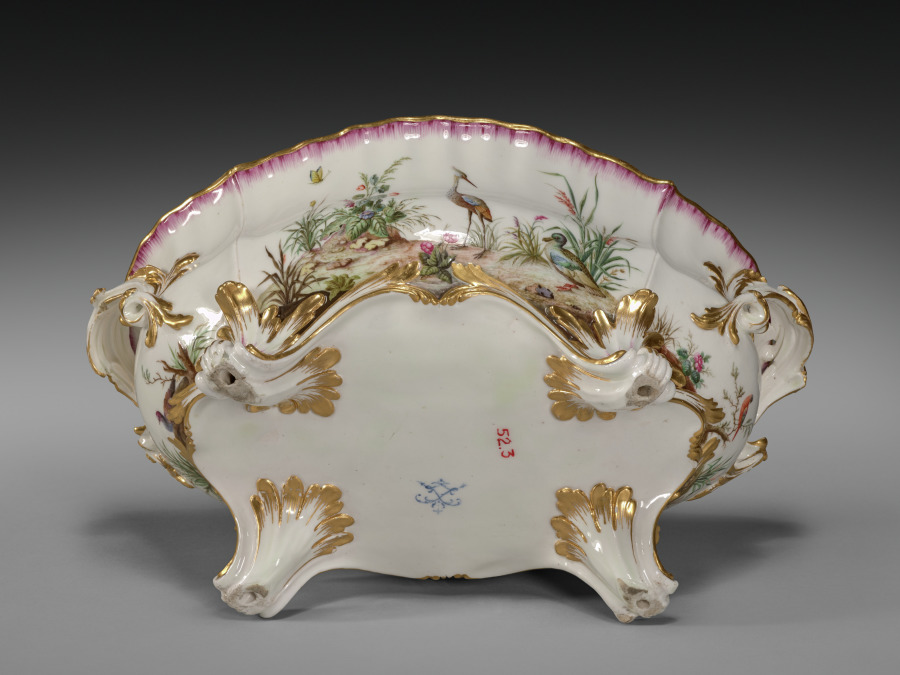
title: Tureen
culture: France, Vincennes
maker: Vincennes Porcelain Factory (France, 1740–56)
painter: attributed to Louis-Denis Armand (French, active c. 1745–1783)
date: c. 1752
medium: soft-paste porcelain with enamel and gilt decoration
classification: Ceramic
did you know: This object was manufactured in soft-paste porcelain, a material used by many European porcelain factories before they were able to emulate the hard-paste porcelain of China and Japan.